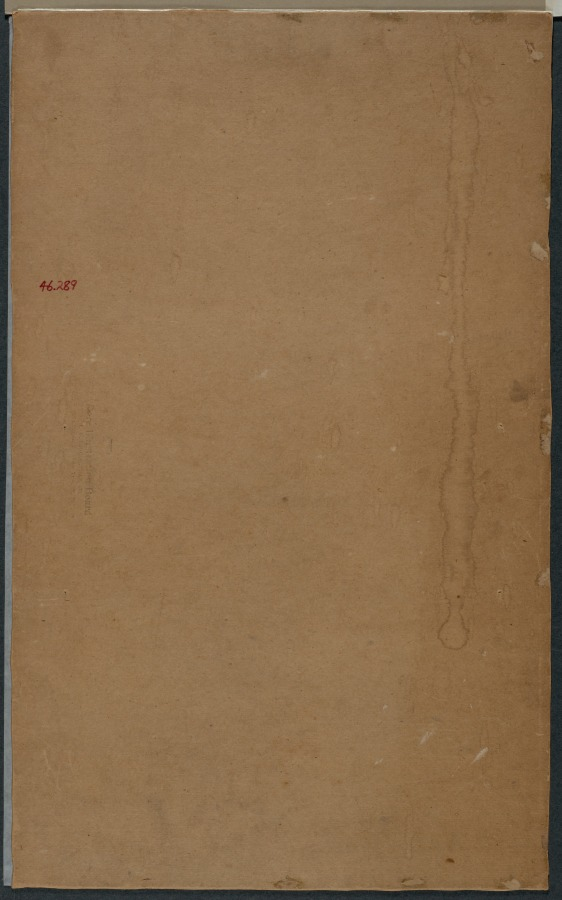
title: Chapel Window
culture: America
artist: John La Farge (American, 1835–1910)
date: c. 1850–1910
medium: watercolor with gouache over graphite; framing lines in black ink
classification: Drawing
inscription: signed, lower right, in brown ink: J LaFarge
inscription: label on verso: Knoedler, p. 1333 F 53798, Chapel Window, St. John the Divine by John La Farge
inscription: Watercolor label, verso, upper left